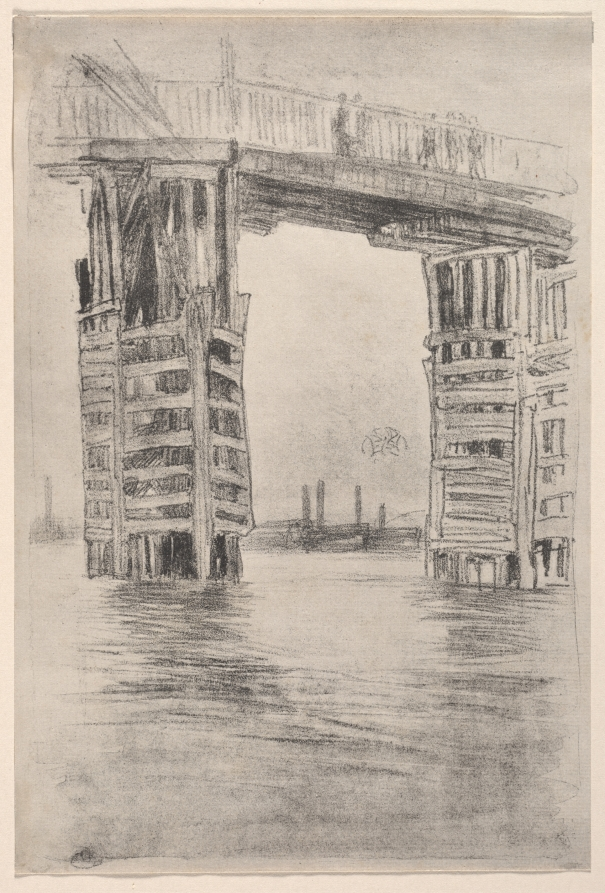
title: The Tall Bridge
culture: America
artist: James McNeill Whistler (American, 1834–1903)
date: 1878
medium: etching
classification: Print